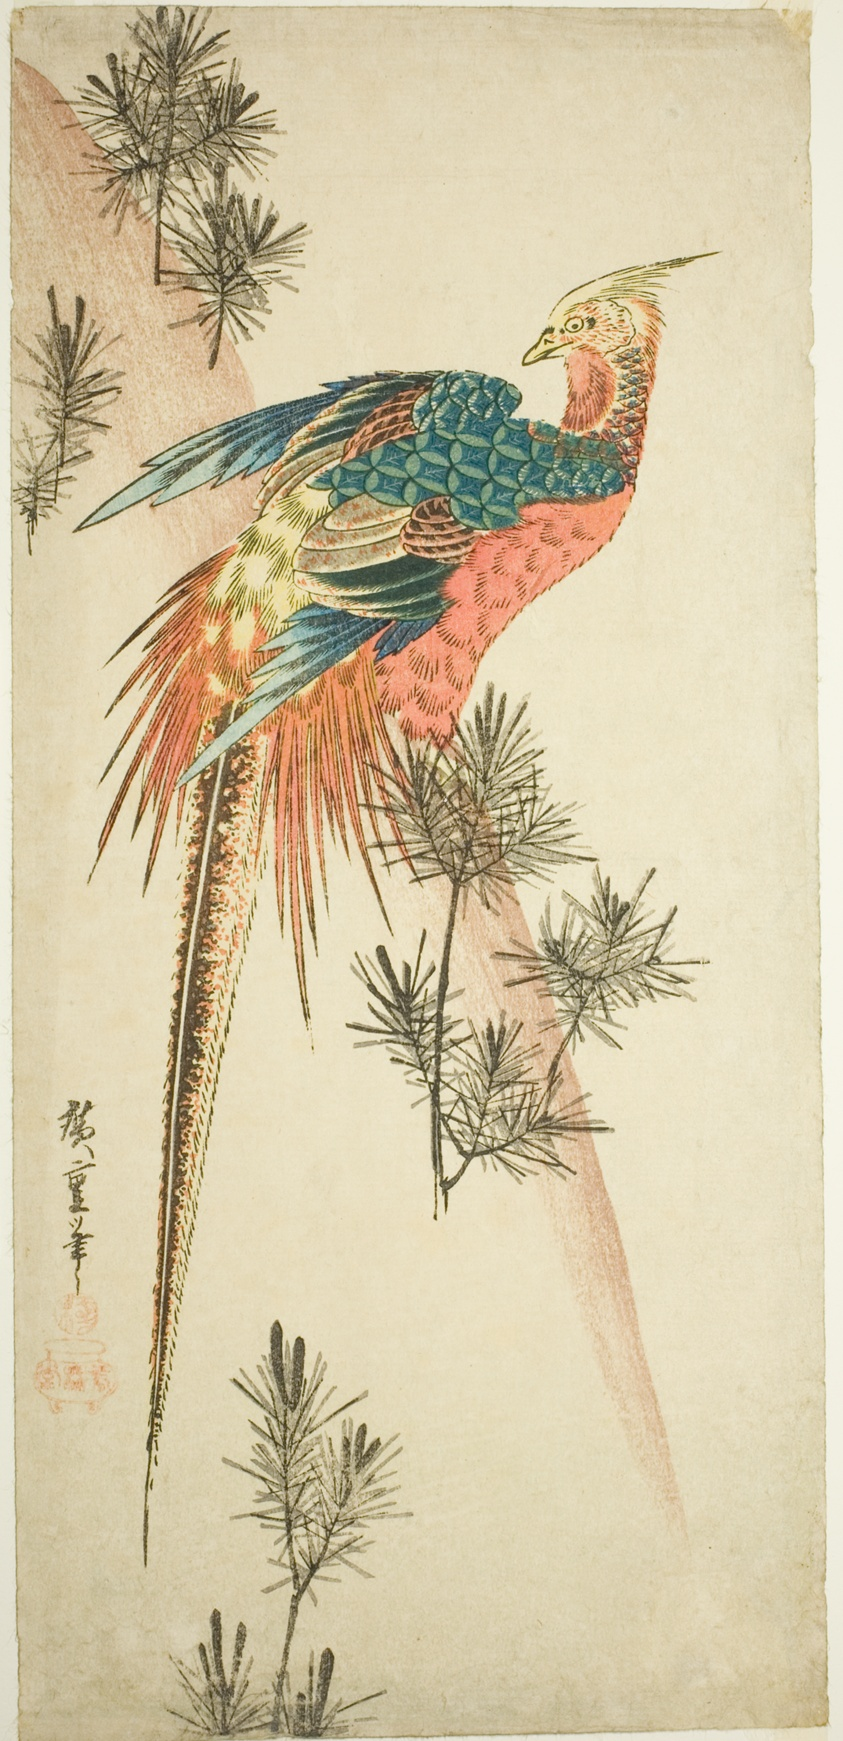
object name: Print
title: Golden pheasant and pine shoots in snow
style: Japanese (culture or style)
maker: Utagawa Hiroshige 歌川 広重; Japanese, 1797-1858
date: c. 1833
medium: Color woodblock print; otanzaku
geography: Japan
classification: woodblock print; print; asian art